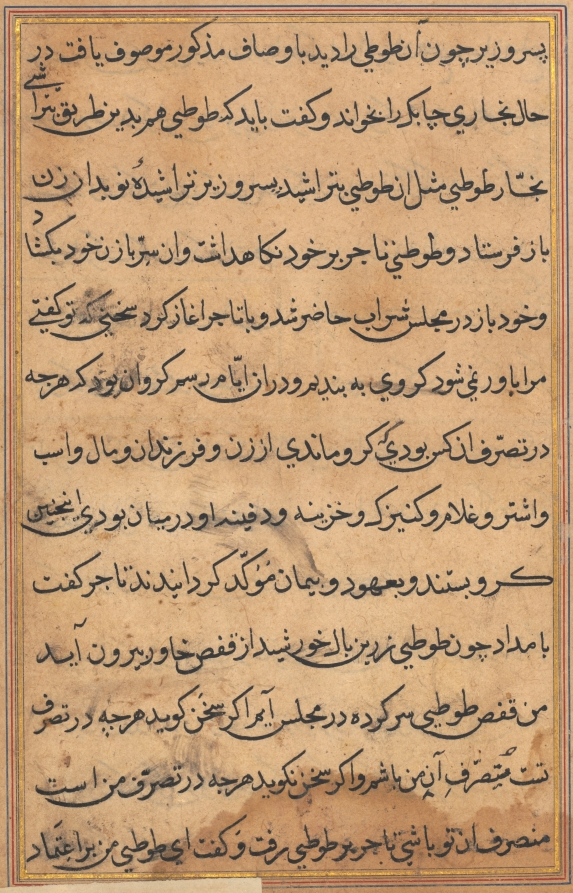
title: Page from Tales of a Parrot (Tuti-nama): text page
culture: Mughal India, court of Akbar (reigned 1556–1605)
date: c. 1560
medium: gum tempera, ink, and gold on paper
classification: Painting